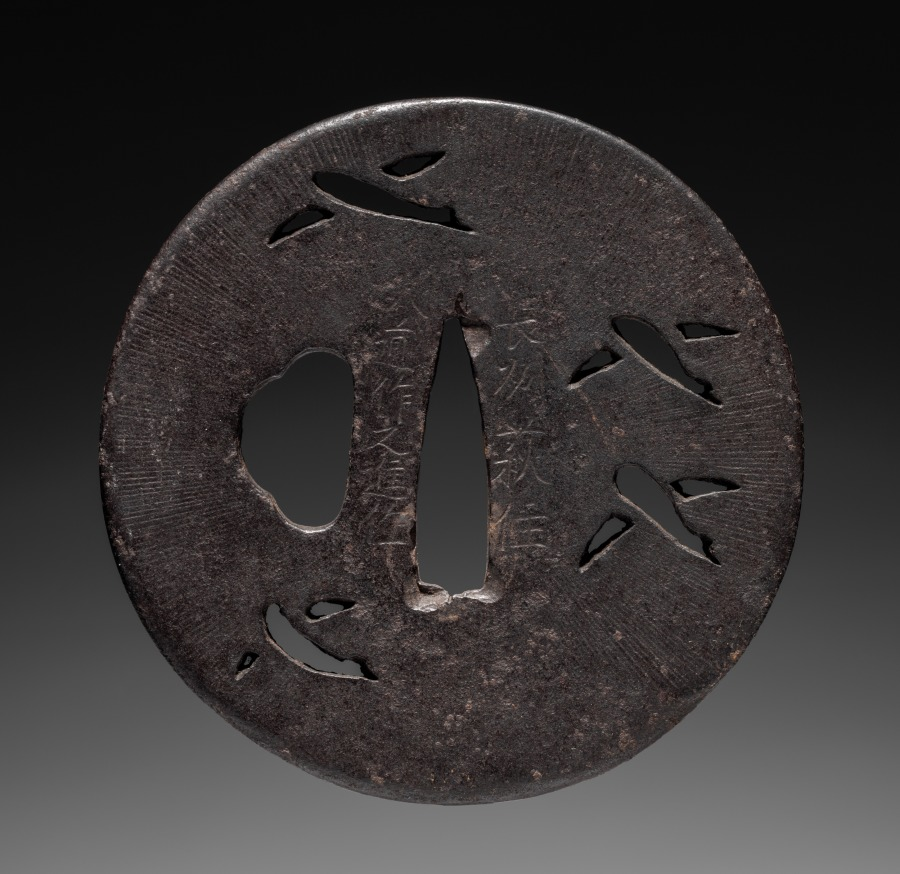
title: Sword Guard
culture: Japan, Edo period (1615–1868)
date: mid-1700s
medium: iron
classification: Arms and Armor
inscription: Signature: Hachido Sakunoshin (Tomohisa), residing at Hagi, Nagato province, made